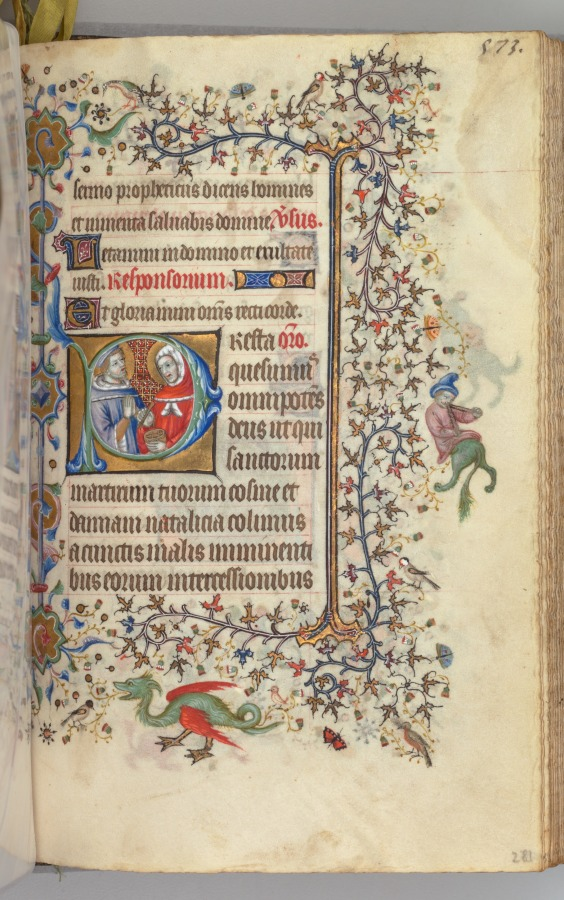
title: Hours of Charles the Noble, King of Navarre (1361-1425): fol. 281r, SS. Cosmas and Damien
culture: France, Paris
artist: Master of the Brussels Initials and Associates (French)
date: c. 1405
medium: ink, tempera, and gold on vellum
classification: Bound Volume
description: This precious volume was obviously highly prized by its owner, the French-born King of Navarre, who had his coat of arms painted on no less than twenty folios. Rather than directly commissioning this manuscript from a specific workshop, it seems that Charles the Noble acquired his book of hours -- perhaps ready-made for the luxury market -- while on a trip to Paris in 1404-05. A collaborative effort, six painting styles are evidenced within the pages of this codex, those of two Italians, two Frenchmen, and two Netherlanders. The painter who was responsible for the planning and decoration of the book, and who produced seventeen of the large miniatures, was a Bolognese artist known as the Master of the Brussels Initials. His principal assistant, responsible for most of the borders, was a Florentine who signed his name "Zecho" da Firenze on folio 208 verso.